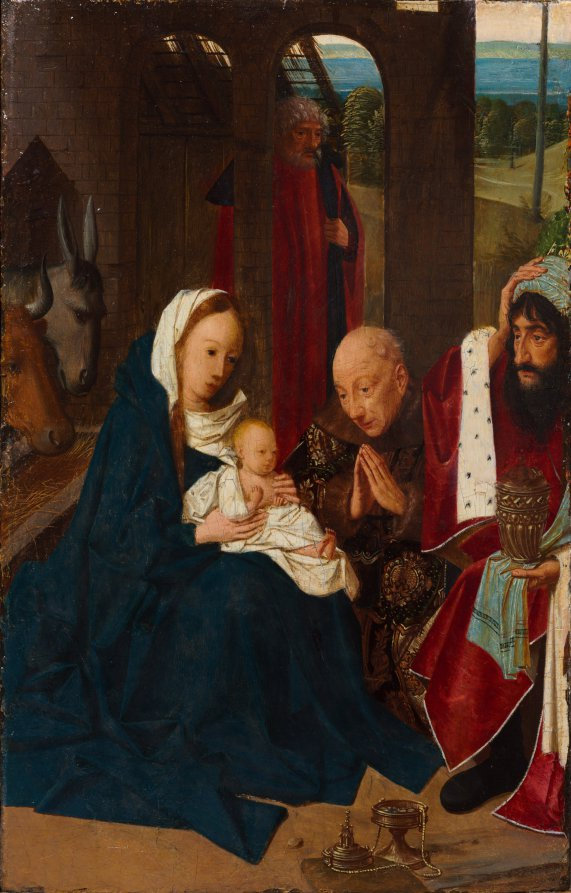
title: The Adoration of the Magi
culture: Netherlands, Haarlem, 15th century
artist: Geertgen tot Sint Jans (Netherlandish, c. 1460-c. 1490)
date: 1480s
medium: oil on wood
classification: Painting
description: Little is known about the life and career of Sint Jans. He seems to have been born in Haarlem in Holland in the northern Low Countries where he may have been attached to the Knights of Saint John as a lay brother, and likely produced an altarpiece for that order. (His name seems to derive from his affiliation with the Knights of Saint John.) He died young in his late 20s. Between 12 and 16 paintings are attributed to him. The subjects tend to derive from the New Testament. The original context of this painting is not known.